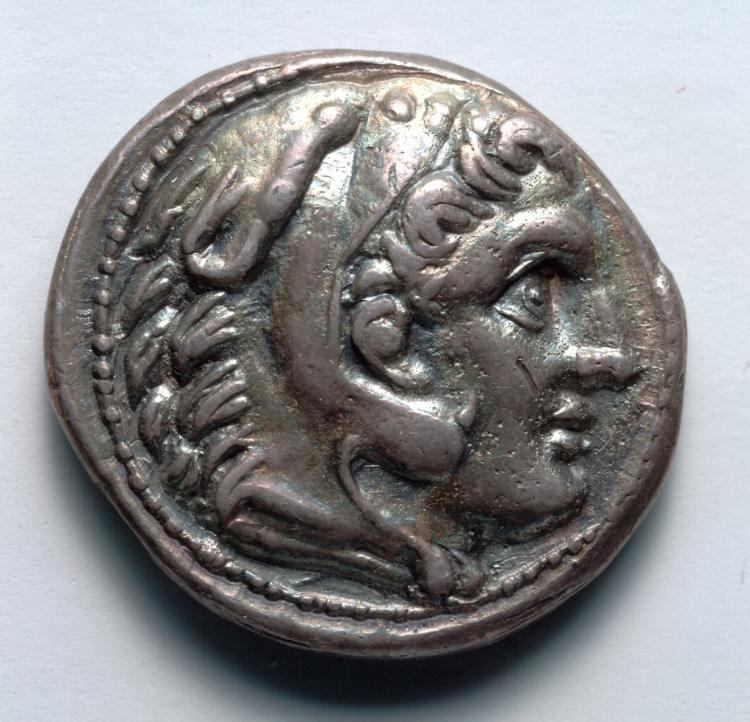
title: Tetradrachm: Head of Young Herakles, r., with Lion Skin (obverse)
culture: Greek, Macedonian, minted at Amphipolis (Macedonia), reign of Alexander III [The Great]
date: 336–323 BCE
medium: silver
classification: Coins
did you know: Alexander the Great claimed descent from Herakles and Zeus, picturing them both on his coinage.